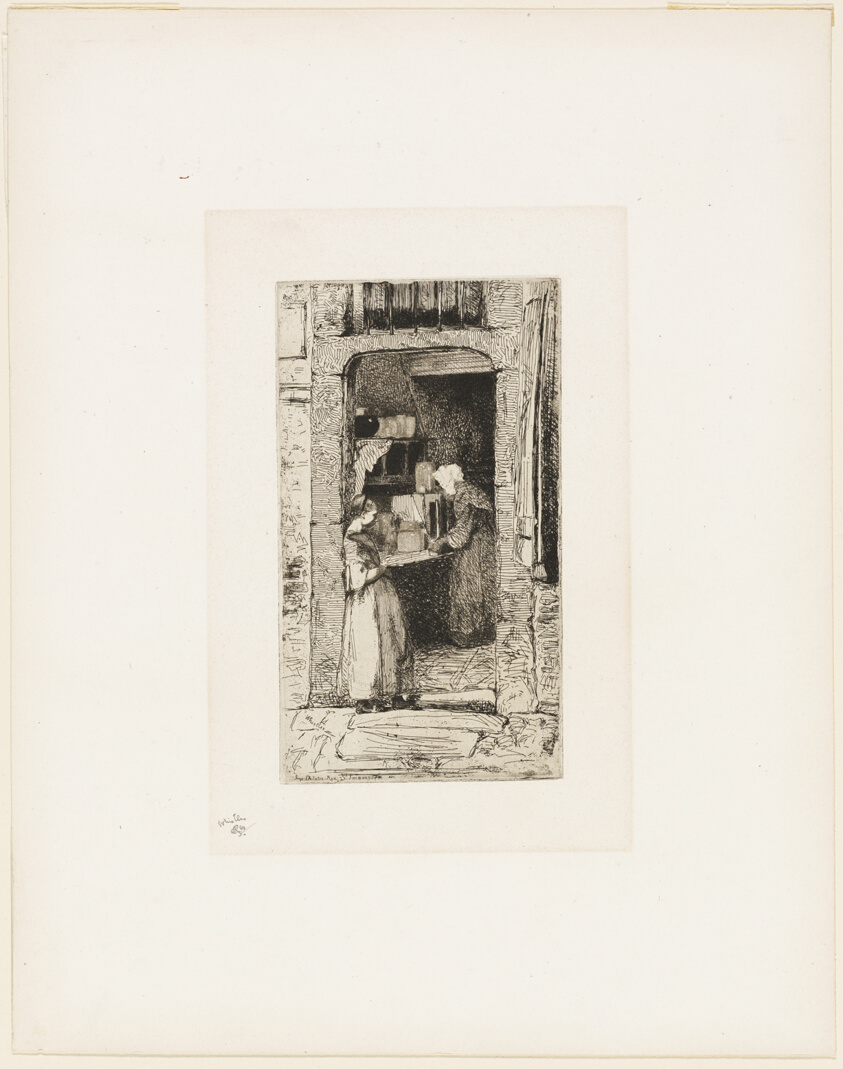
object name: Print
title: La Marchande de Moutarde (The Mustard Seller)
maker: James McNeill Whistler (American, 1834-1903)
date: 1858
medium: Etching with foul biting in black ink on off-white China paper laid down on off-white wove paper, chine collé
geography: United States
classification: etching; foul biting; print; prints and drawing; paper